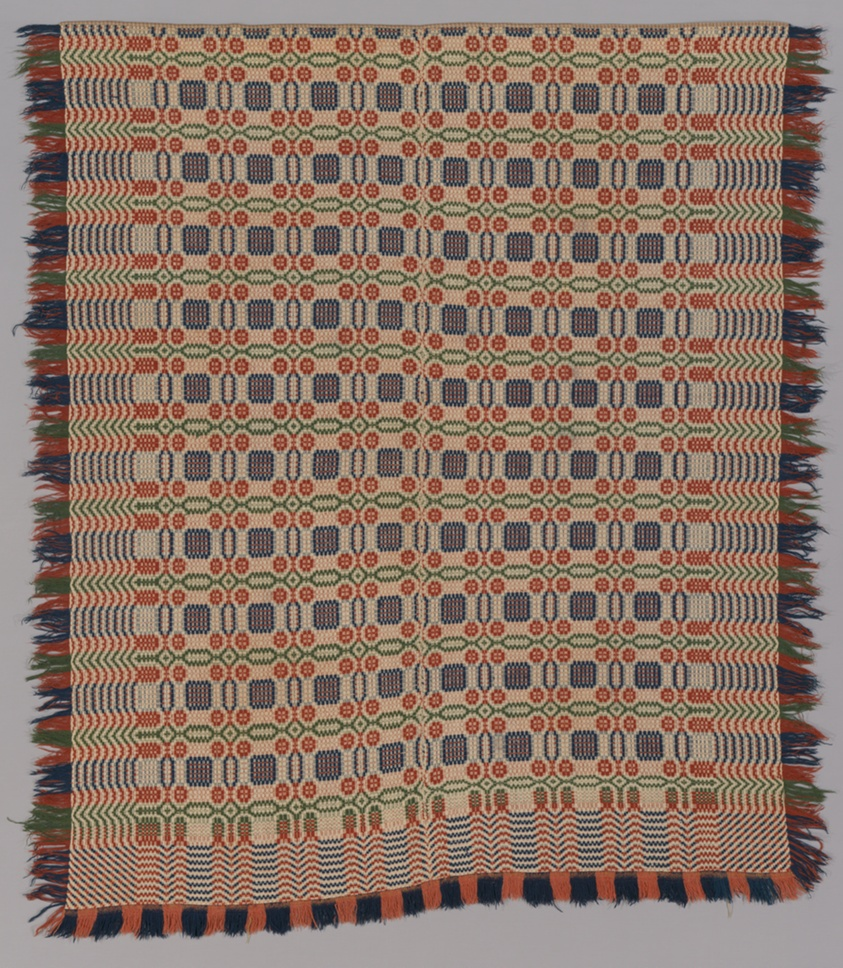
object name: Textile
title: Coverlet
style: 19th century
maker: United States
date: 1820s/30s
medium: Cotton and wool, plain weave with supplementary patterning wefts (overshot) and extended supplementary patterning weft fringe; bottom edged with wool, plain weave with extended ground weft fringe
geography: United States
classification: weaving - coverlet; coverlet; textile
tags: geometric motif, lines, diamond shapes, geometric, squares, coverlet